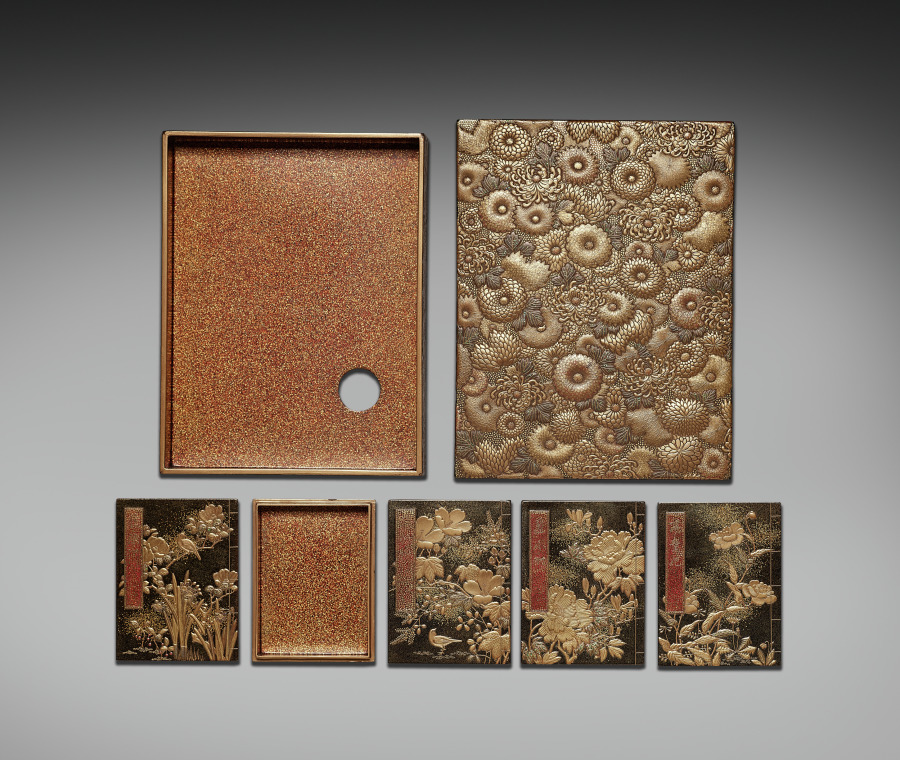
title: Nested Boxes with Chrysanthemums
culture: Japan, Meiji period (1868–1912)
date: early 1900s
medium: Set of five boxes; lacquered wood with sprinkled gold powder (maki-e)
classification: Lacquer